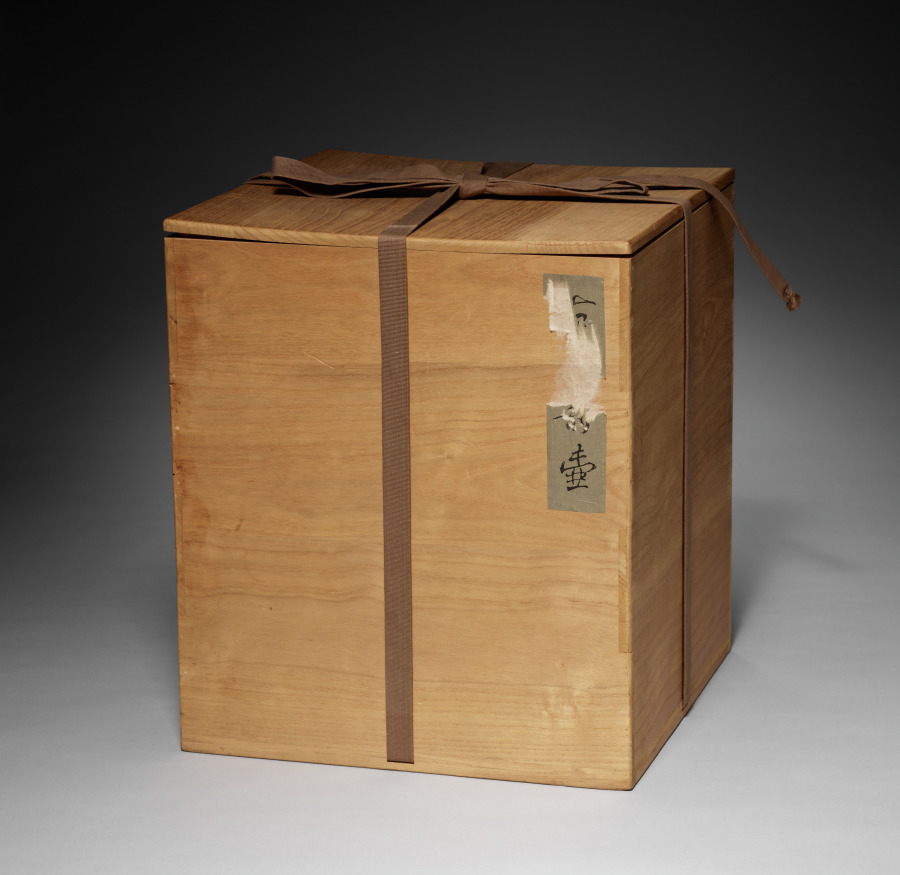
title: Large Jar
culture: Japan, Muromachi period (1392–1573)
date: 1400s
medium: stoneware with natural ash glaze (Shigaraki ware)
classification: Ceramic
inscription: Box inscription (front): 「不明」壺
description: The orange color of this jar comes from iron in the clay. Natural ash glaze settled on the vessel during firing. Originally intended for grain storage, rustic containers like this one were also prized by tea enthusiasts, who appreciated the uncalculated beauty of the glaze and the asymmetry of these humble objects. They used them to store tea leaves.